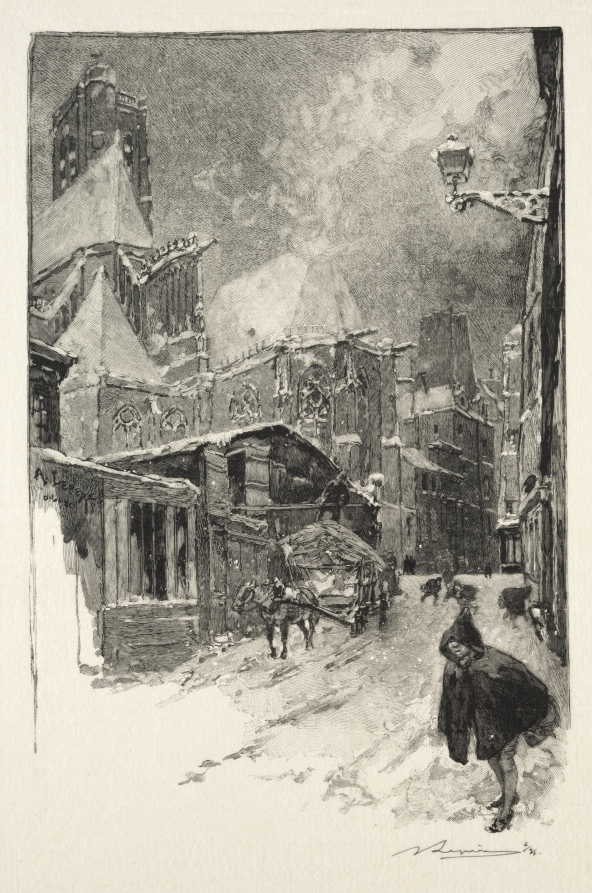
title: La Rue des Barres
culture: France, 19th century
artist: Auguste Louis Lepère (French, 1849–1918)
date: 1886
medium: wood engraving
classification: Print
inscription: On block center, left side: "A. Lepère"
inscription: Written in ink: "6/35"